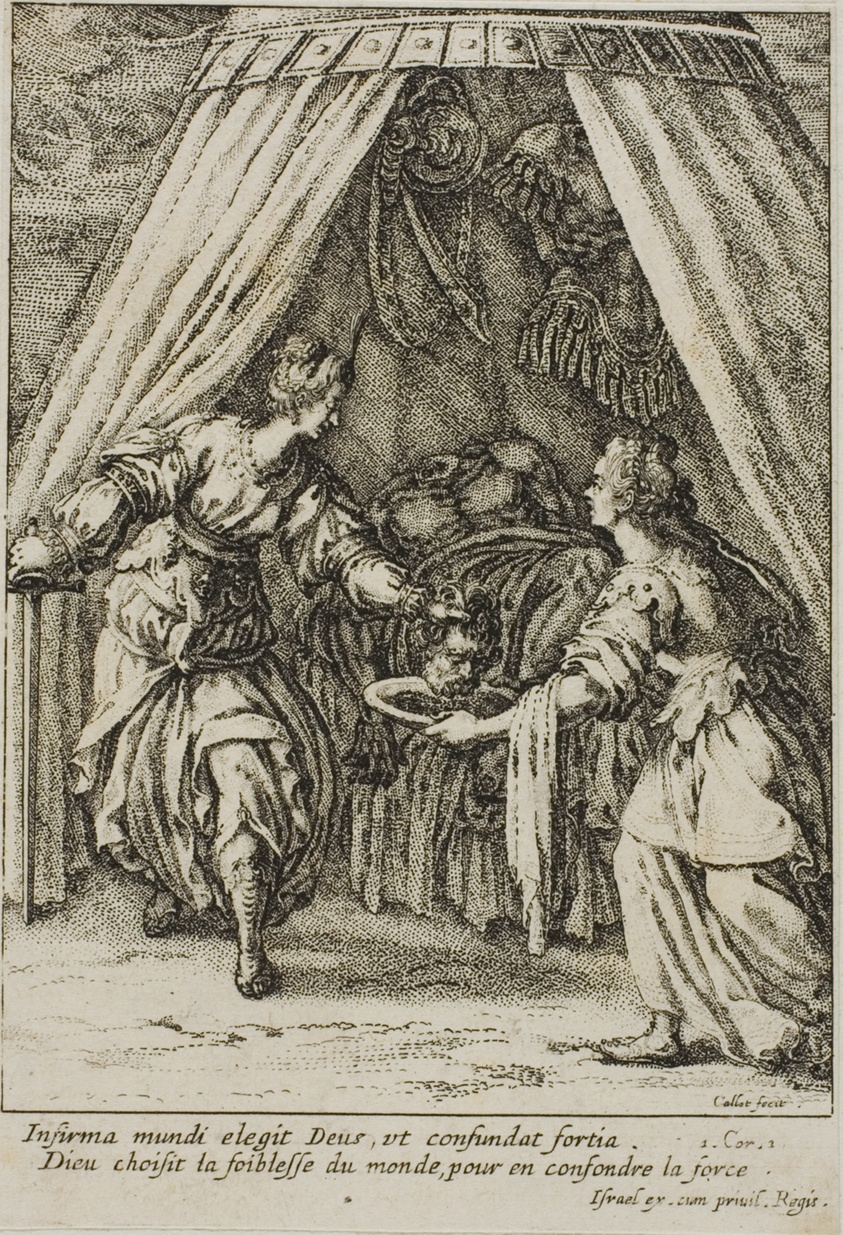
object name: Print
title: Judith with the Head of Holofernes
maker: Jacques Callot (French, 1592-1635)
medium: Etching on paper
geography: France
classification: etching; print; prints and drawing